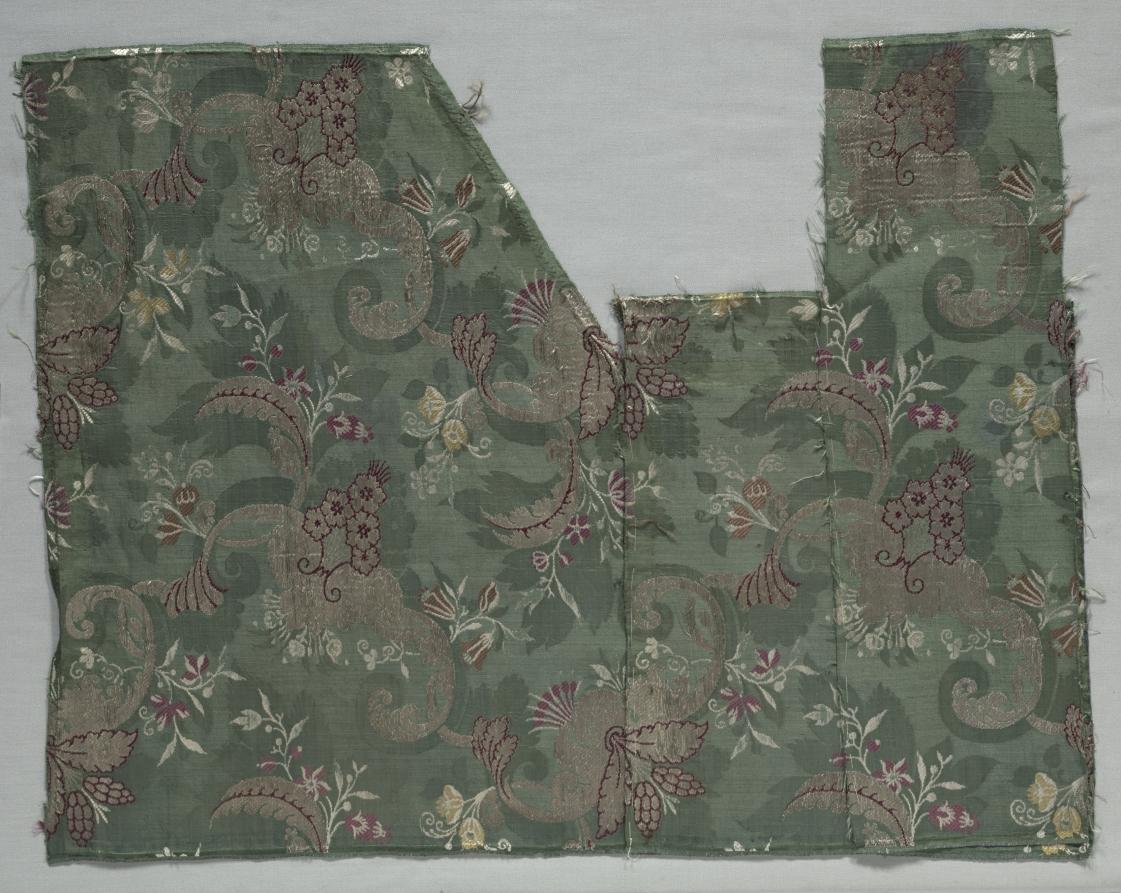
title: Length of Silk Damask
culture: Italy, 18th century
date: 1700s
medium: damask, brocaded; silk and metal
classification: Textile